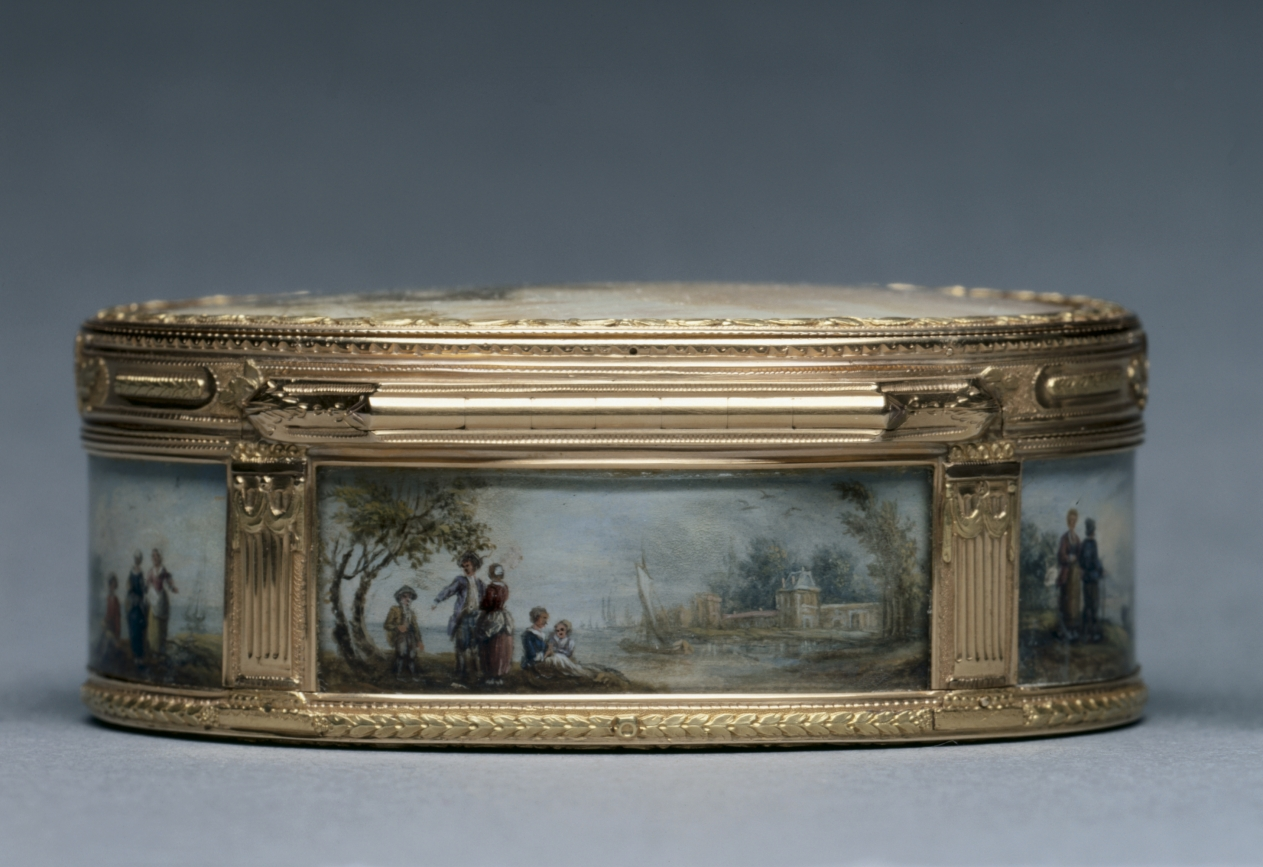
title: Snuff Box (Tabatière)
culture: France, 18th century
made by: Pierre-Nicholas Pleyard (French)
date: 1768–69; 1776–78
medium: gouache miniatures mounted on gold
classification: Metalwork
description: Snuff boxes were highly ornamented functional objects popular among French social elites. They were simultaneously containers for powdered tobacco and a means to communicate social and political status. Often decorated with miniature paintings inspired by popular paintings of the time, the works reproduced on this box are modeled after those of Claude-Joseph Vernet (cover and front panel) and David Teniers the Younger (base, side, and back panels).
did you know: These miniature paintings are mounted à cage, a practice popular in the mid-1700s that involved setting decorated panels into gold frames to create a box’s walls.